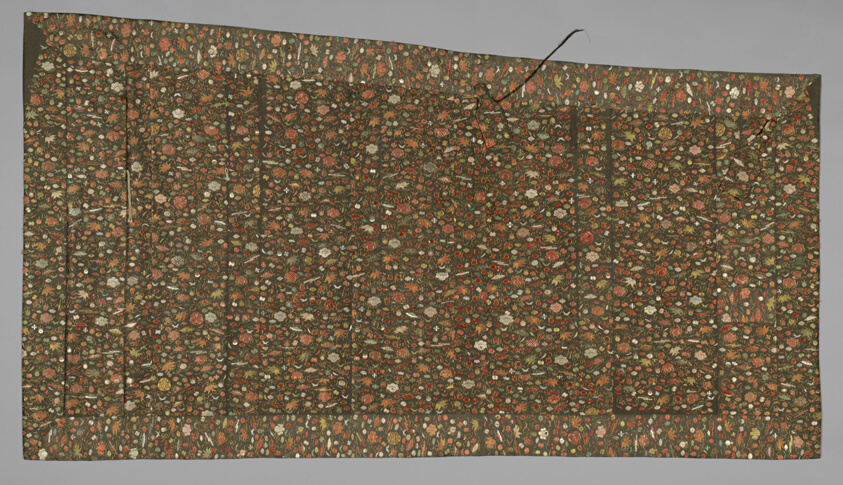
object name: Textile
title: Kesa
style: edo (japanese period), late edo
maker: Japan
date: 1750/1800, Edo period (1615–1868)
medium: Silk; plain weave, embroidered with silk and gilt-paper-strip-wrapped silk; silk cords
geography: Japan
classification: textile; weaving; needlework (visual works); liturgical - buddhist